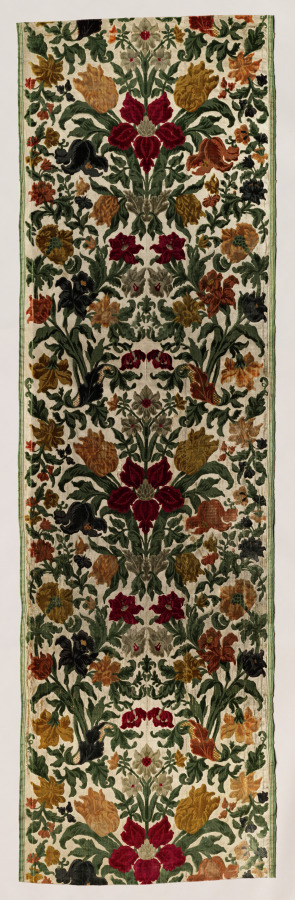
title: Length of Floral Velvet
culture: Italy, Genoa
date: 1600s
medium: velvet (cut, uncut, voided); silk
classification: Velvet